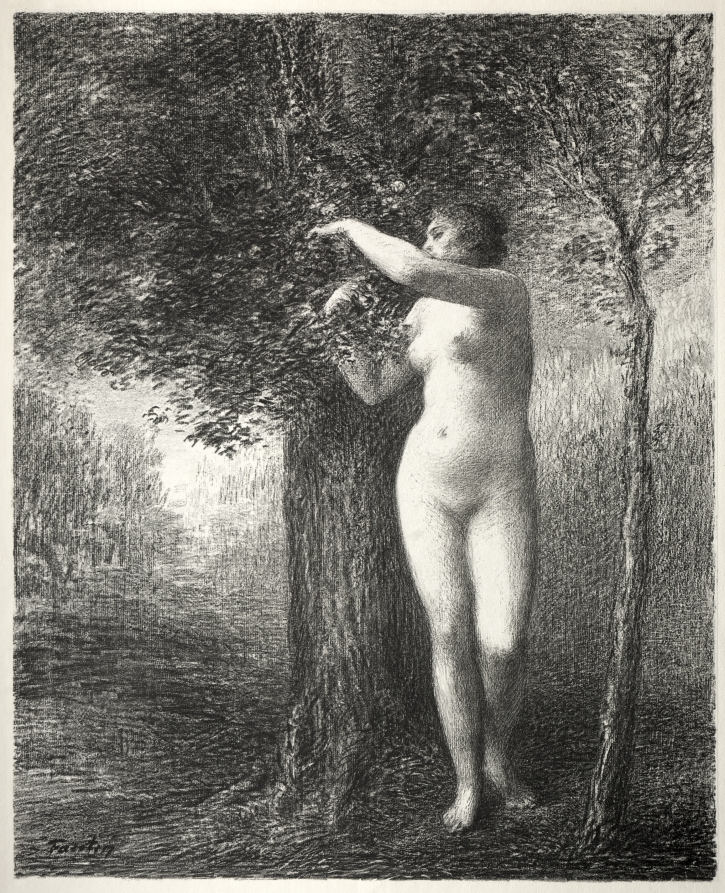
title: Eve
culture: France, 19th century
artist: Henri Fantin-Latour (French, 1836–1904)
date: 1896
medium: lithograph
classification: Print